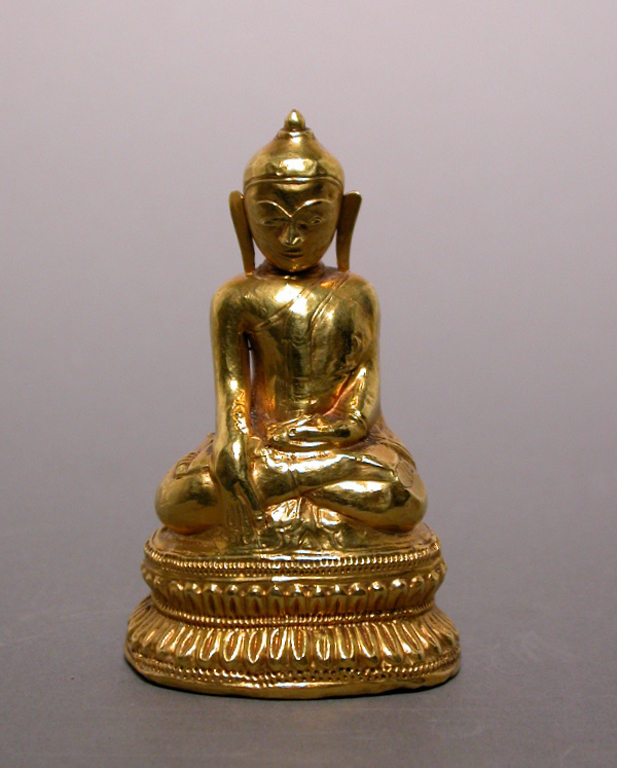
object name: Sculpture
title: Buddha Triumphing over Mara (Maravijaya)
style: Southeast Asian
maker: Thailand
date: 18th/19th century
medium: Gold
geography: Thailand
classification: gold; metal; sculpture; asian art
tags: Buddha